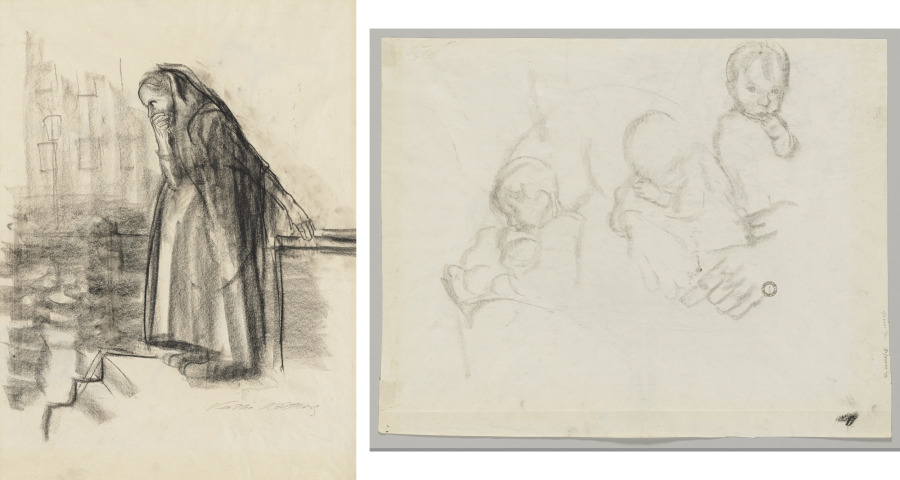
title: Pregnant Woman Contemplating Suicide (recto) Three Studies of a Child (verso)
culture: Germany, 20th century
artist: Käthe Kollwitz (German, 1867–1945)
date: c. 1926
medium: black chalk or charcoal? (rubbed in places)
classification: Drawing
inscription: signed, lower right, in graphite: Kathe Kollwitz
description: Working in a frank but emotional naturalistic style far different from that of her contemporaries, Käthe Kollwitz depicted a pregnant woman who stands as a universal symbol of human grief. Just a few bold strokes of crayon relay the woman’s despair. After World War I, Kollwitz’s work focused on the sorrows of those left behind: the children, widows, and mothers who underwent loss, physical neglect, and economic hardship. Her focus on grief and despair in this and other works emerged especially after her youngest son, Peter, was killed in the first months of the war.